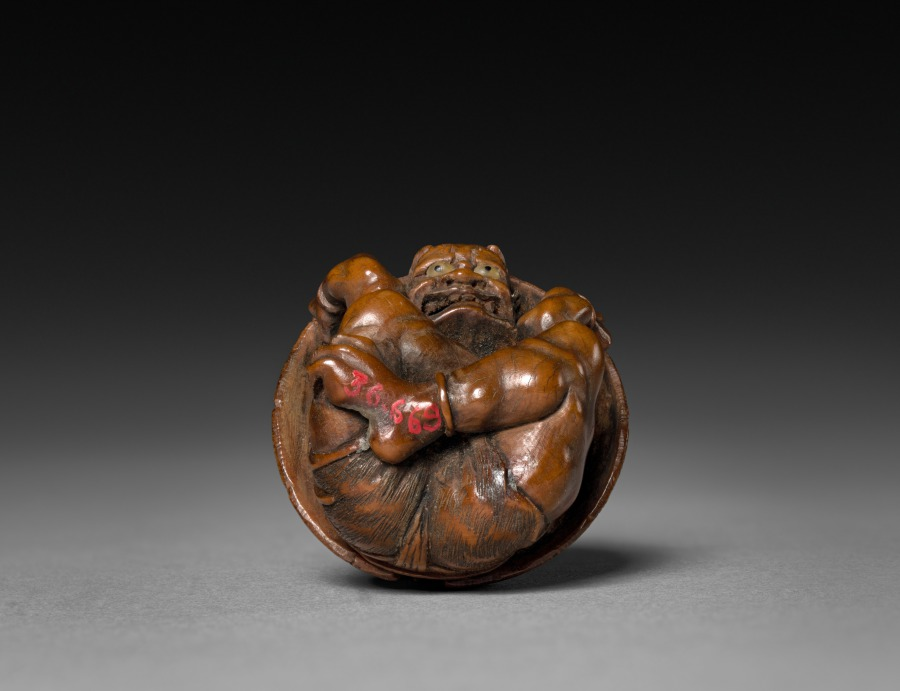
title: Demon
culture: Japan, Edo period (1615–1868)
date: 1615–1868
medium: wood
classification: Netsuke